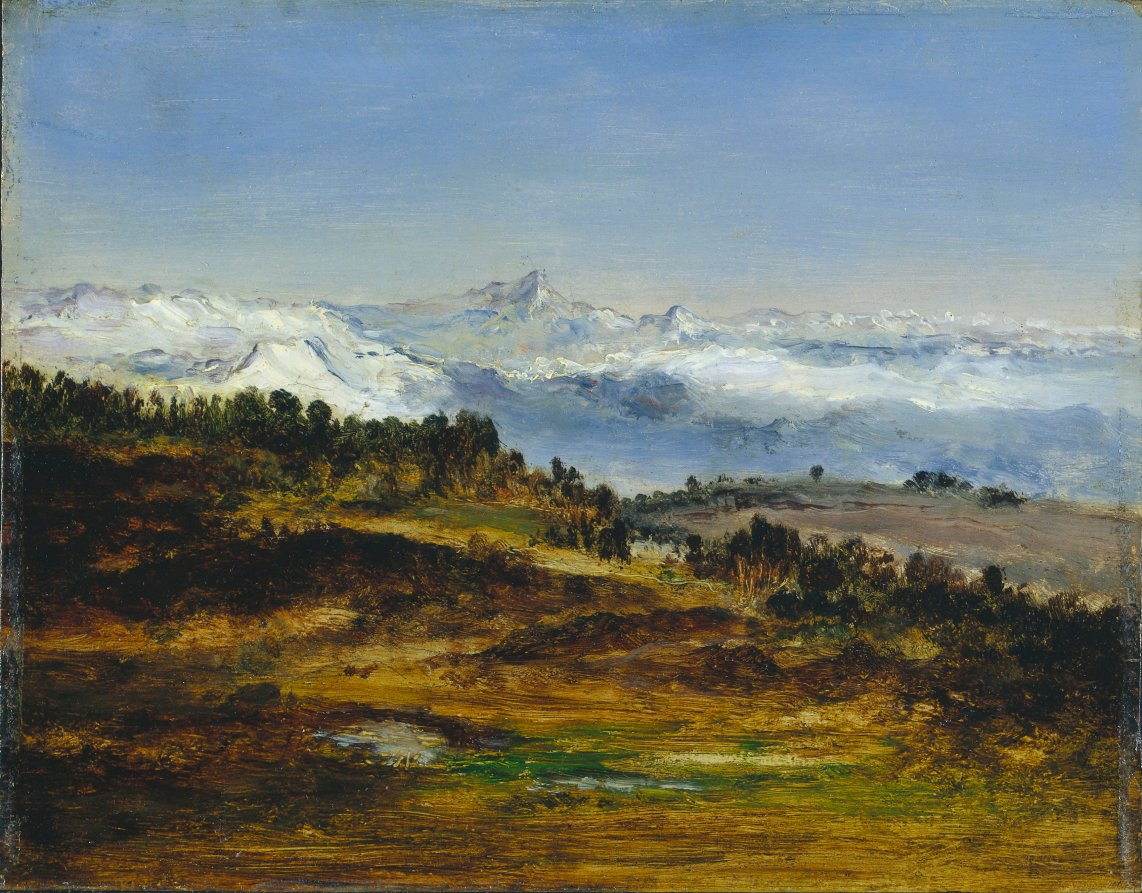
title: The Pyrenees, the Peak of the Midi de Bigorre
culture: France, 19th century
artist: Narcisse Diaz de la Peña (French, 1807–1876)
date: 1871–1872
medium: oil on wood panel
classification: Painting